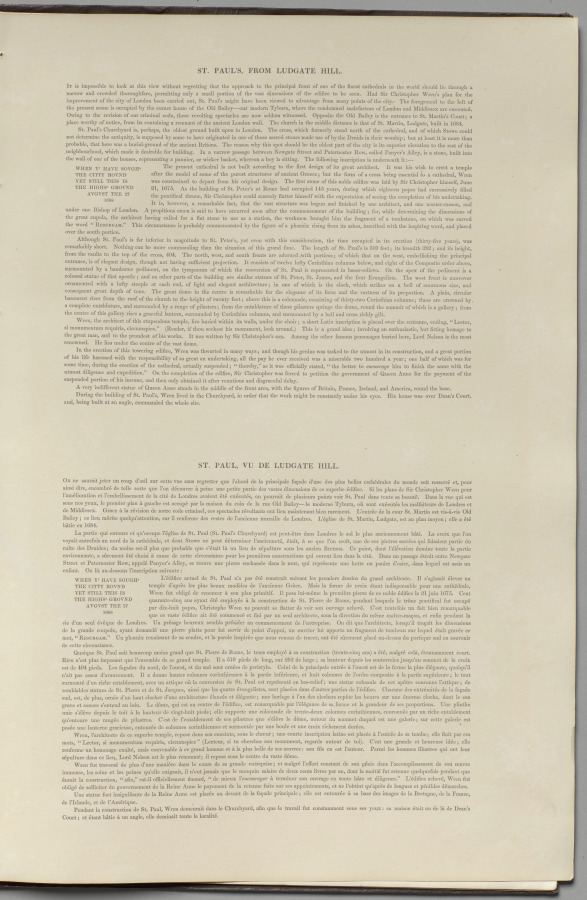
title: London As It Is: St. Paul's, from Ludgate Hill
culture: England, 19th century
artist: Thomas Shotter Boys (British, 1803–1874)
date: 1842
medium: lithograph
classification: Bound Volume